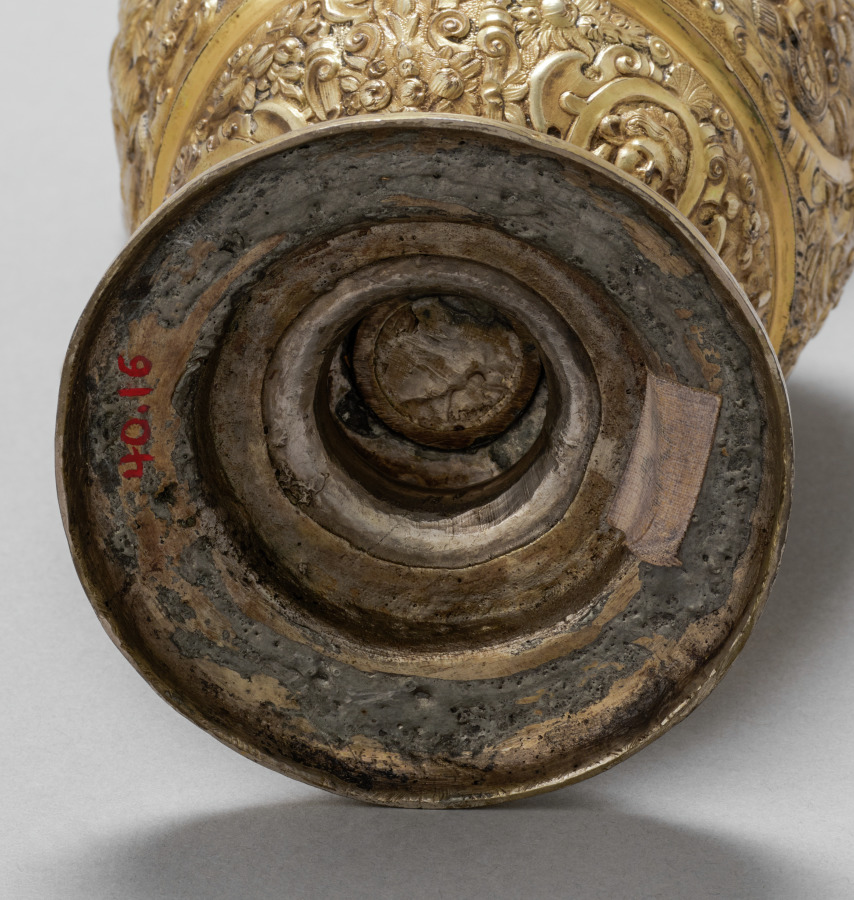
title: Ewer with Relief Scenes of Allegories of War, Peace, and Abundance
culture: France, 17th century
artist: workshop of Caspar Enderlein (German)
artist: copy after François Briot (French)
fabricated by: Hans Sigmund Geisser (German)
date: 1645–65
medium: silver gilt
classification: Silver